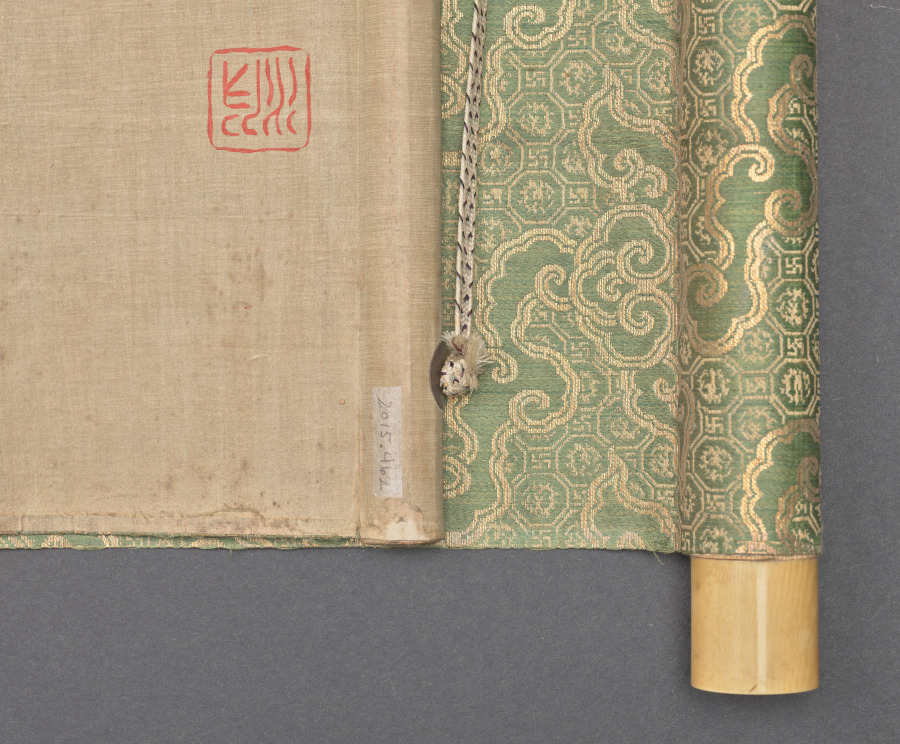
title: Rocks and Waves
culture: Japan, Muromachi period (1392–1573)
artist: attributed to Kano Motonobu (Japanese, c. 1476–1559)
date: early to mid-1500s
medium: sliding door fragment mounted as a hanging scroll; ink and gold wash on paper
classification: Painting